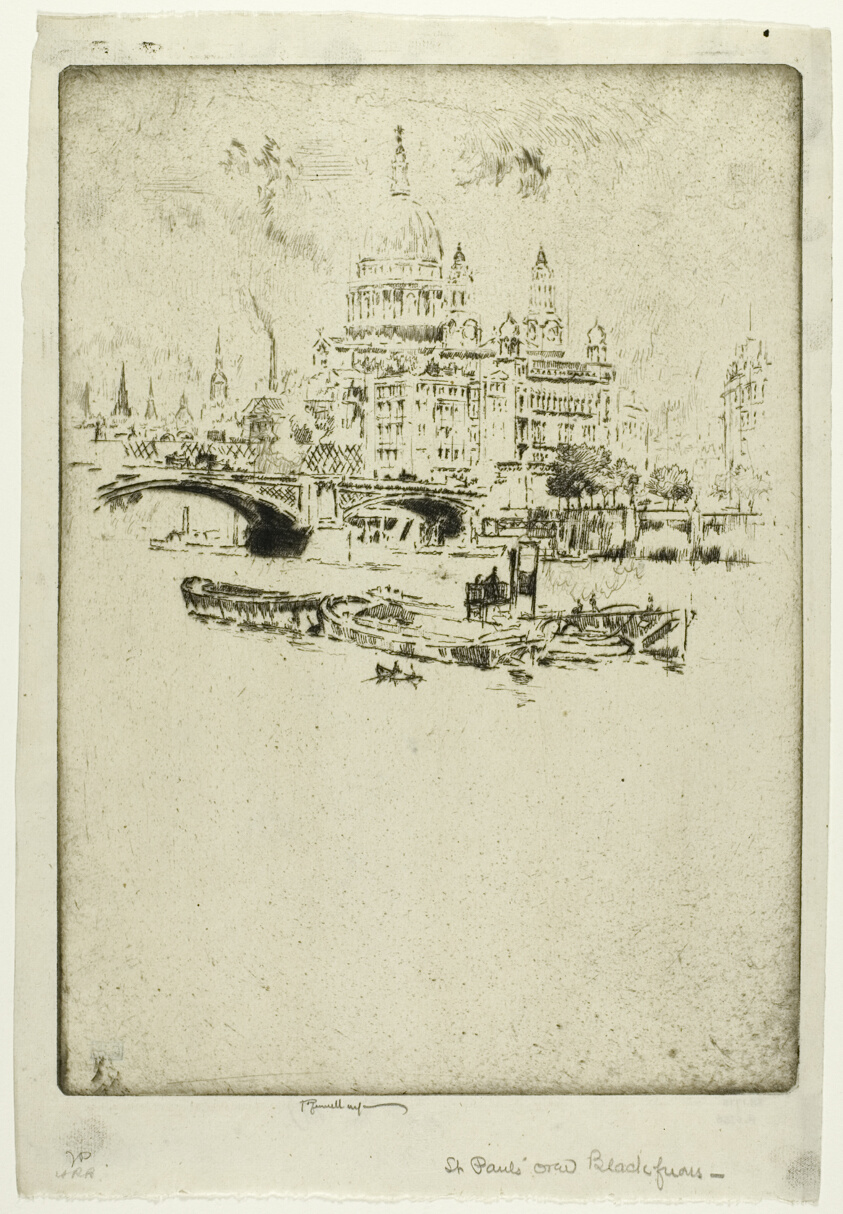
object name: Print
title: St. Paul's from the River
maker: Joseph Pennell (American, 1857-1926)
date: 1906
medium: Etching on ivory wove paper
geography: United States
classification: etching; print; prints and drawing